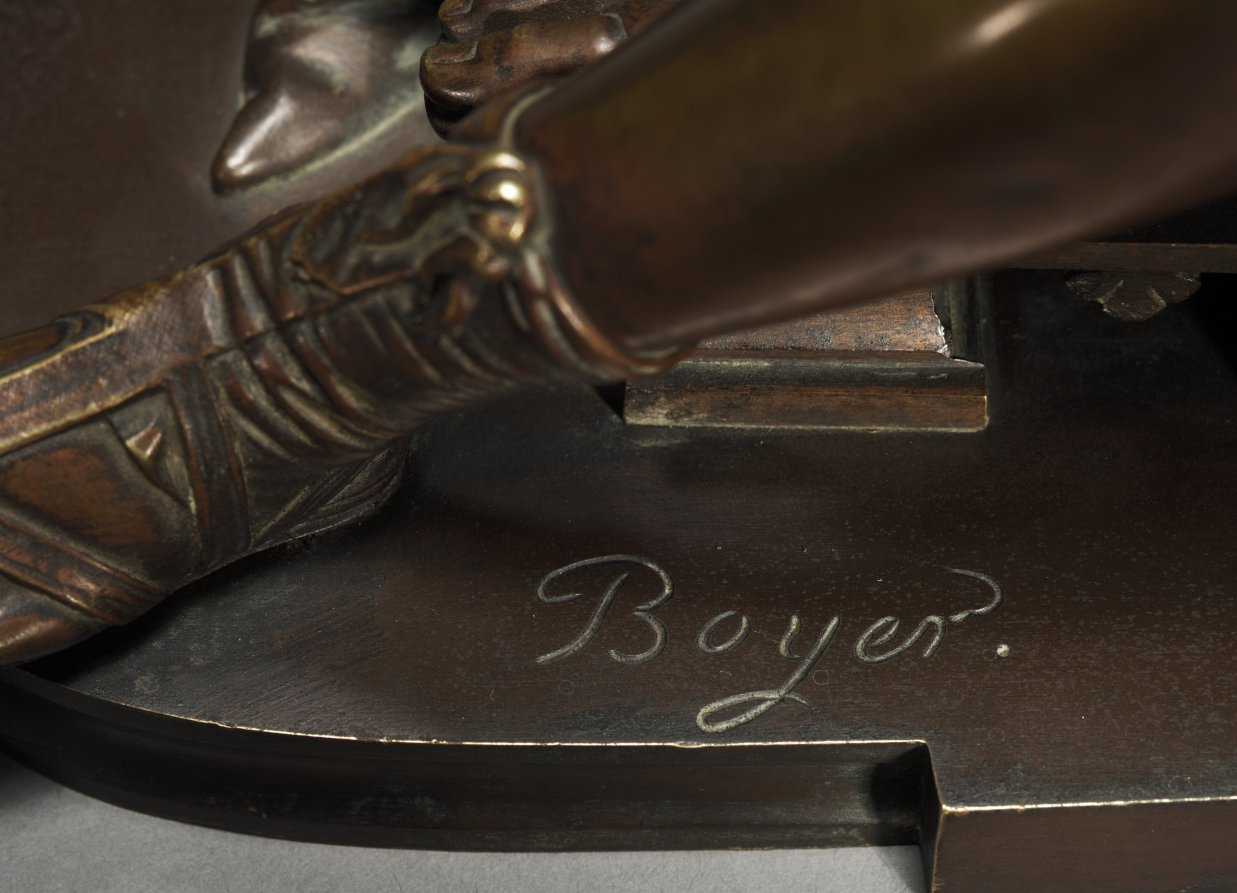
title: Orpheus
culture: France, 19th century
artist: Albert-Ernest Carrier-Belleuse (French, 1824–1887)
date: early 1860s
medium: bronze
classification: Sculpture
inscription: Signed: "A. Carrier"; inscribed: "Boyer"